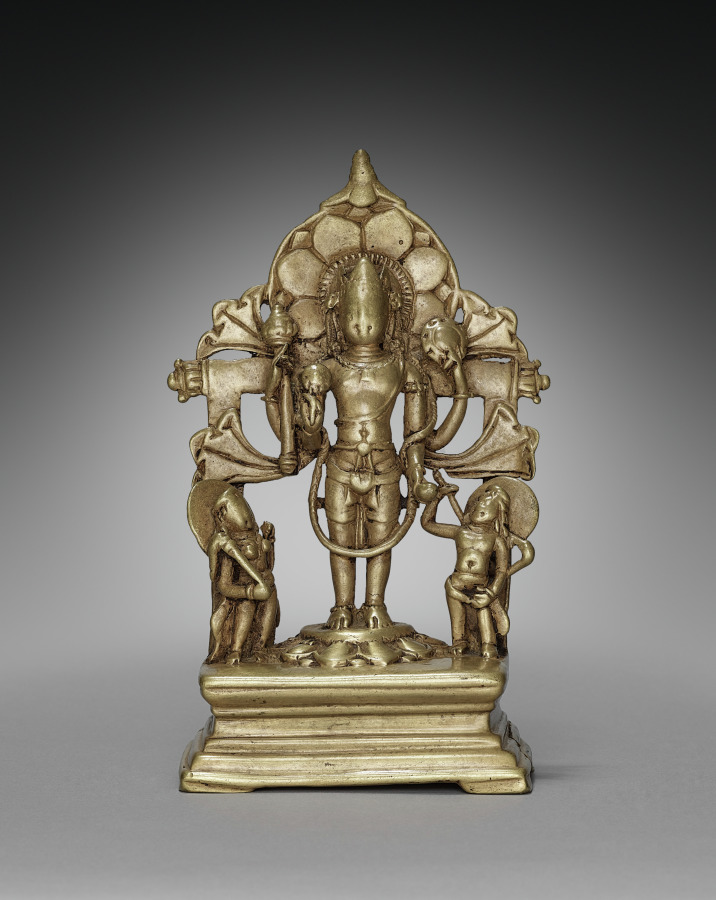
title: Standing Vishnu with Attendants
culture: India, Kashmir, 9th century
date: 800s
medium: brass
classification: Sculpture